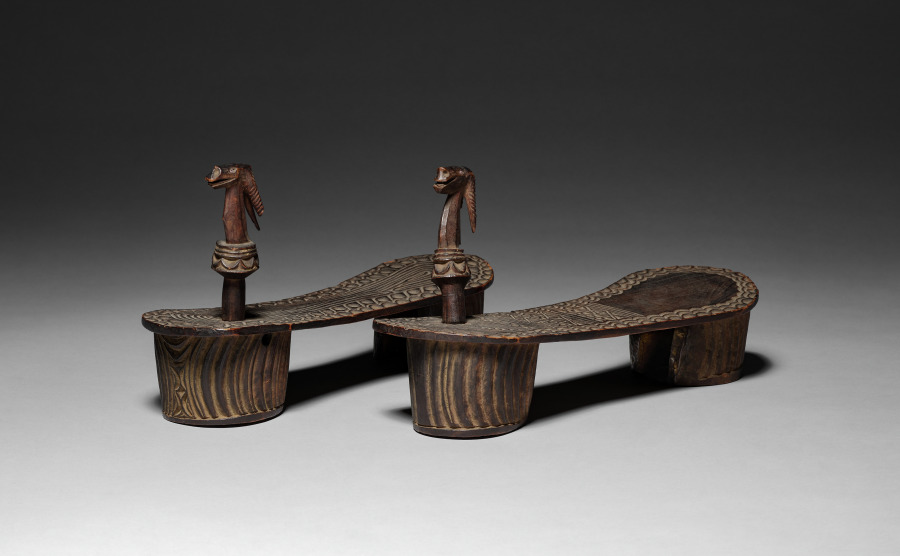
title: Sandals (mitalawanda / mitawanda) or Clogs (kiatu cha mti)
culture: Africa, Central Africa, Democratic Republic of Congo, unidentified carver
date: c. 1800s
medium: Wood and glass beads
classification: Garment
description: Common in the Indian Ocean region, wooden sandals changed meaning across place and time. This pair’s base elevates the foot as the toes grip an antelope-shaped peg (msuruaki). Crisp geometric sole designs suggest they were rarely worn. East African elites and merchants once had exclusive rights to wooden shoes, wearing elaborate ones only for portraits. Formerly enslaved people living along the coast wore simpler ones from the 1840s onward, adopting elite footwear to assert their liberation. However, slave traders like the Zanzibari “Tippu Tip” (c. 1832–1905) likely brought mitalawanda to Central Africa; stylistic elements of this pair hail from that region.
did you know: This distinctive footwear traveled from Southeast Asia and the Middle East to Africa, first to the Swahili Coast and then further inland to parts of Central Africa. The deity Krishna wears similar shoes (paduka) in an eighteenth-century Indian miniature painting (2003.344).